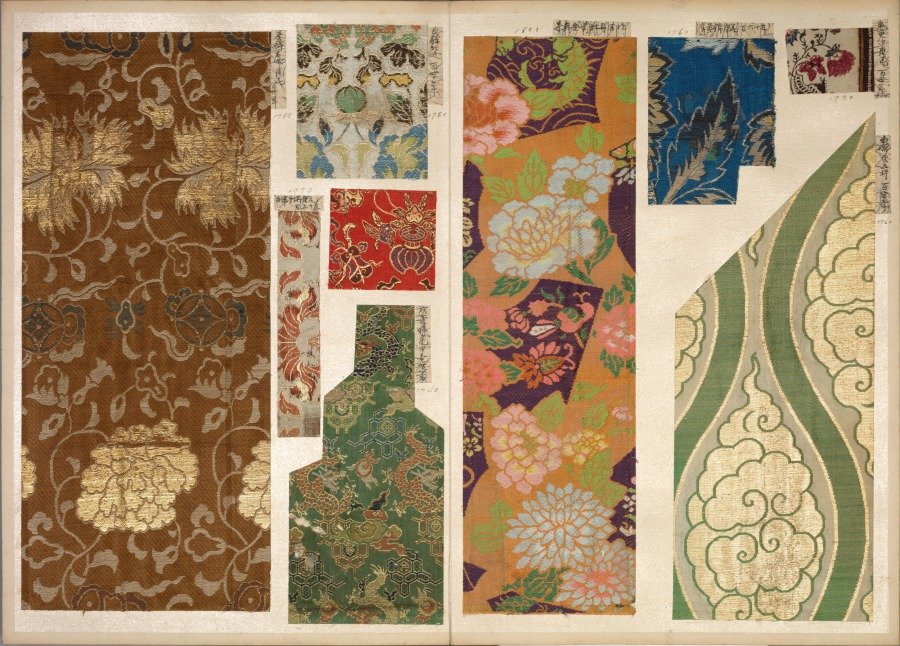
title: Album of Textile Samples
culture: Japan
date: 1790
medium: silk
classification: Textile